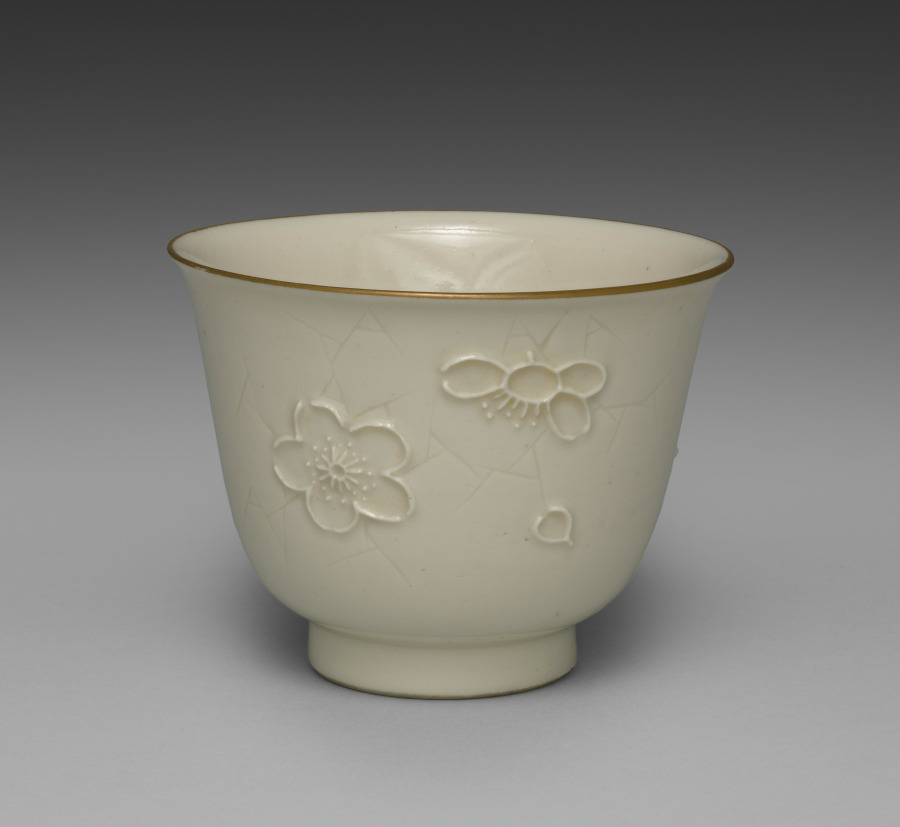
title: Drinking Cup from Dining Set with Plum Blossoms and Cracked-Ice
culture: Japan, Meiji period (1868–1912)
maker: Seifū Yohei II (Japanese, 1844–1878)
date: c. 1875–78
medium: Porcelain with molded designs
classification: Ceramic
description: Each item in this set has a delicate low-relief design of flowering plum branches over scattered, intersecting lines meant to resemble the cracked-ice surface of a frozen body of water and is signed on the base in gold pigment. While Yohei II produced many fine works in underglaze blue, like those produced by Kiyomizu Shichibei, he also made works in quite different styles later in his career, from the early 1870 s. In 1873, he was appointed purveyor to the Industrial Center of Kyoto Prefecture, a designation associated with Kyoto’s efforts to reach an international market through the port of Kobe; and from 1875 until his death, he was involved in national-level projects to present Japanese ceramics across the world. It was during this period that Yohei III was apprenticed to Yohei II, and it has been suggested that this set may in fact be an early example of Yohei III’s work, which he signed with his teacher’s name. Decorated with flowers resembling Japanese textile motifs, the set calls to mind the design of Yohei II’s pair of vases with plum blossoms in the Victoria and Albert Museum. Here, the elaborate trees created for a formal public exhibition setting have been translated into the approachable blossoms of the genteel domestic environment. While the designs are consistent across the pieces, each raised flower petal and pistil and each incised line in the ice was done by hand, so the cups, bowls, and dishes are similar yet unique. The bottoms of two boxes once identified the set’s owner, but the information has been deliberately obscured with black ink. However, inscriptions still visible appear to indicate two occasions, once at the end of July 1886 , and once again in June 1916 , when parts of the set were requested from Hokura in Niigata Prefecture. The location corresponds to a neighborhood in the present-day city of Jōetsu. The surname Tsuji 辻 also appears on a paper tag affixed to one of the box cloths. Future research may possibly reveal more about their provenance. A vase by Yohei III in a private collection combines the formal grandeur of the Yohei II vases in the Victoria and Albert Museum with the gentler design of this dining set, placing flowering plum trees against soft, scalloped-edge clouds resembling those in golden screens.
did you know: The dining wares have a creamy white coloration that the four boxes containing them identify as Korean in style.